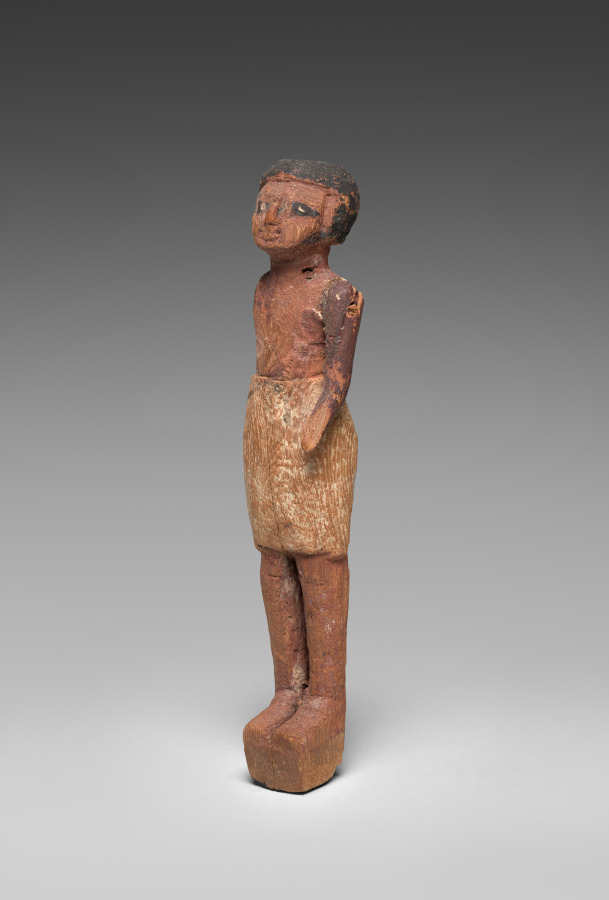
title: Model Figure of a Man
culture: Egypt, Middle Kingdom (2040–1648 BCE), Dynasty 12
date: 1980–1801 BCE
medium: painted wood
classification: Funerary Equipment